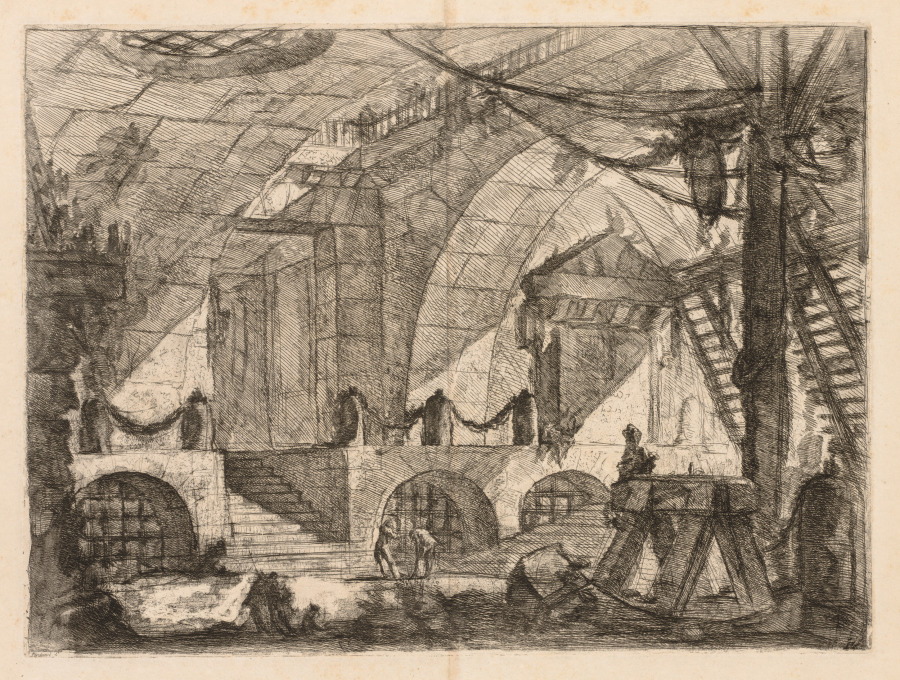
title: The Prisons: An Arched Chamber with Posts and Chains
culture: Italy, 18th century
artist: Giovanni Battista Piranesi (Italian, 1720–1778)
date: 1745–1750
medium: etching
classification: Print